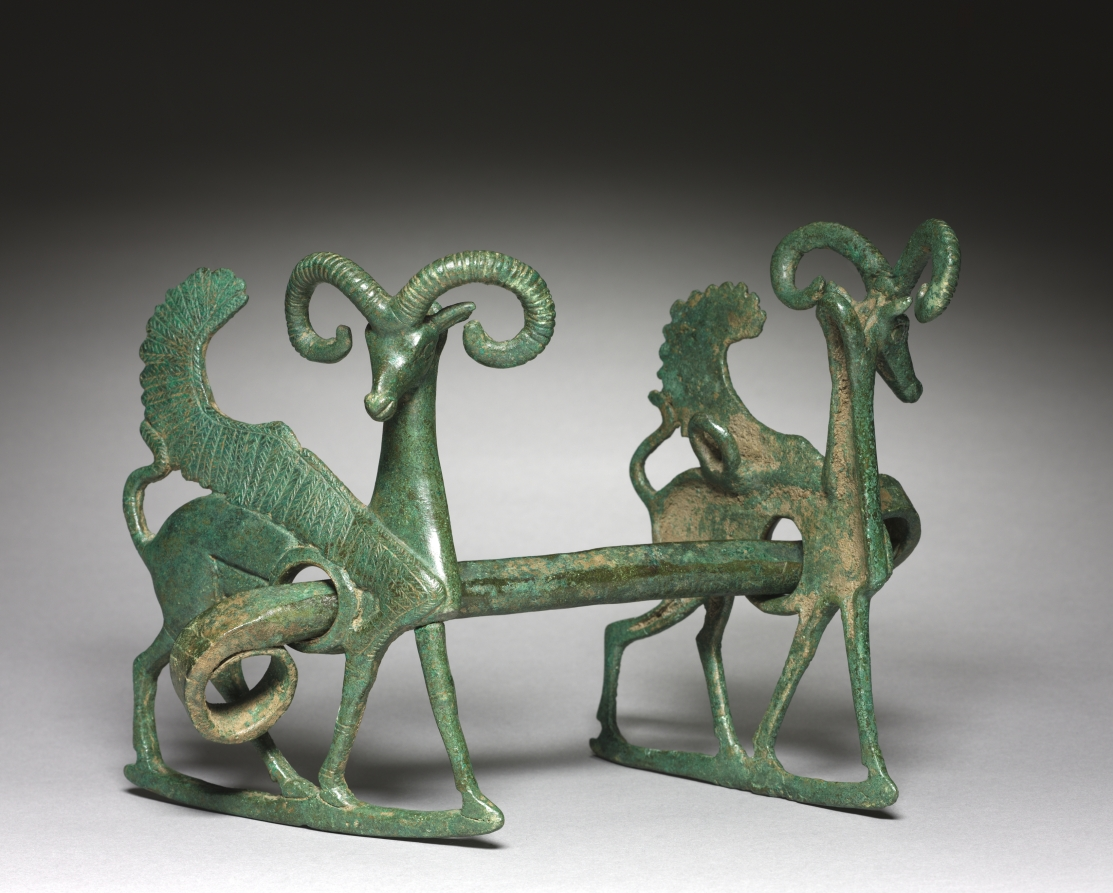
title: Horse Bit with Winged Ibex Cheekpieces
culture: Iran, Luristan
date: 800–600 BCE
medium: bronze, cast and incised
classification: Sculpture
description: This cast bronze horse bit joins two cheekpieces in the form of winged ibexes striding forward with turned heads. Incised lines decorate their curved horns and feathered wings. Rings penetrating their bodies hold the metal bit, while smaller rings on the hollow, unworked inner sides (behind the heads and hindquarters) may have held straps to secure the bit over the horse’s face. This work is said to be from Luristan, a region in western Iran known for its creation of bronze weapons, horse trappings, and standards in the Iron Age.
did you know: Fantastical creatures such as winged ibexes and sphinxes often appear in Luristan bronzes.